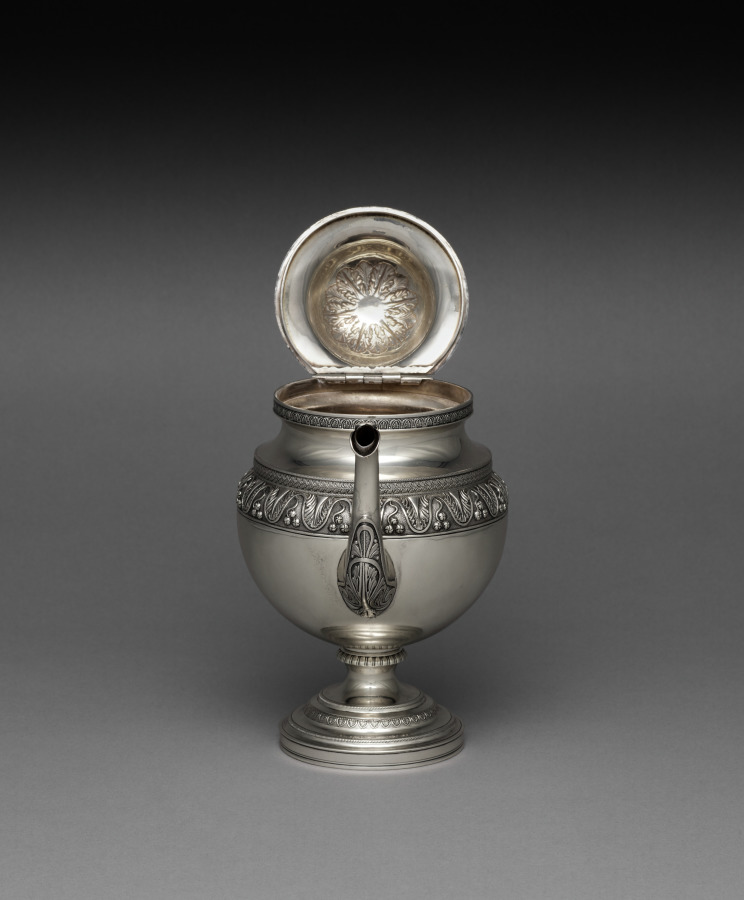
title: Covered Pot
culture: America, Pennsylvania, Philadelphia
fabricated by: Harvey Lewis (American, 1835)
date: c. 1811–25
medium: silver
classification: Silver